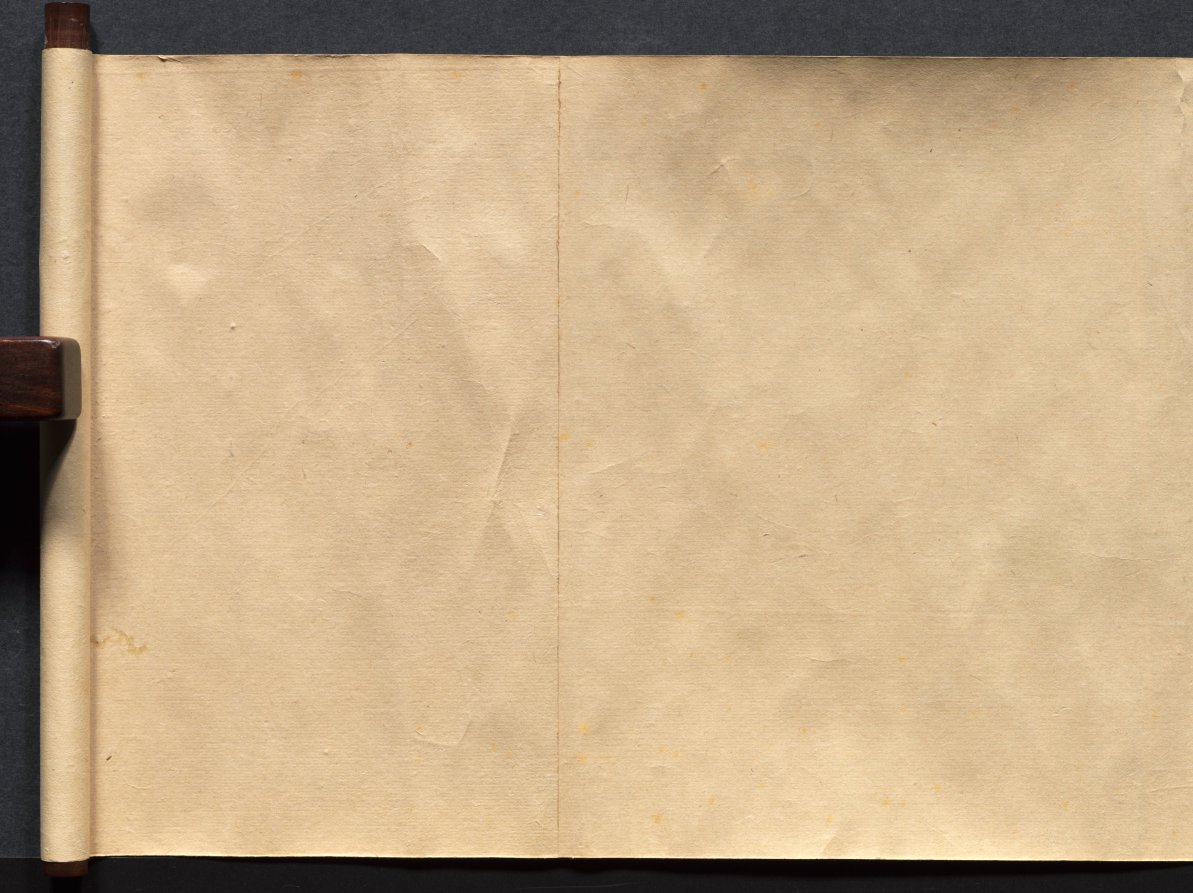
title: Festival Scenes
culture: Japan, Edo period (1615–1868)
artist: Suzuki Nanrei (Japanese, 1775–1844)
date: c. 1795–1844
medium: handscroll; ink and color on paper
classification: Painting